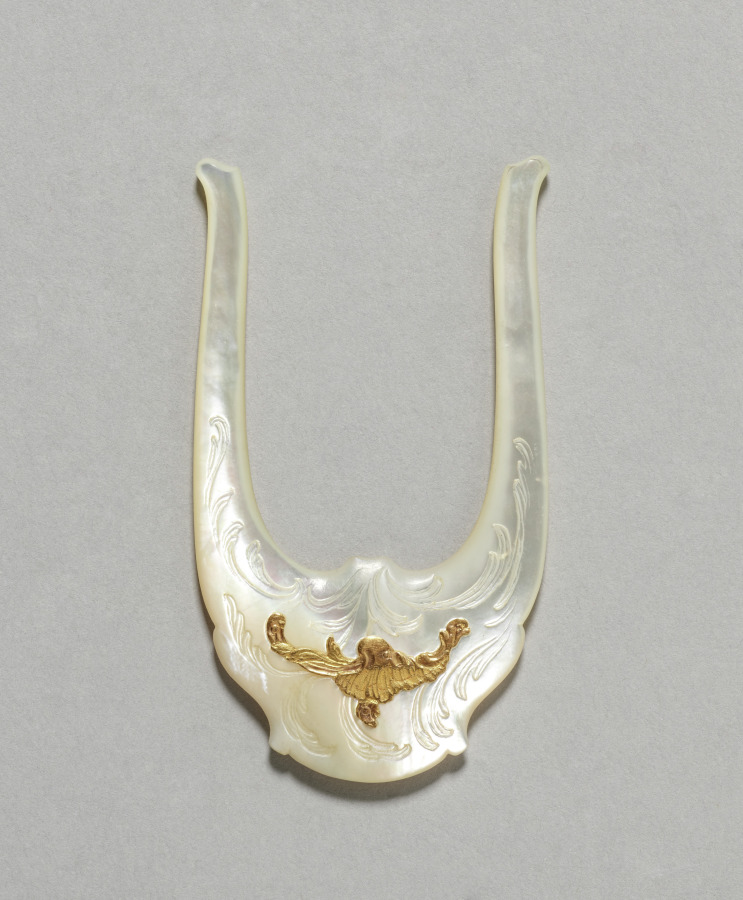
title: Lucet from a Sewing Box (Nécessaire)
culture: Austria, possibly Vienna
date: c. 1765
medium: gold and mother-of-pearl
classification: Miscellaneous